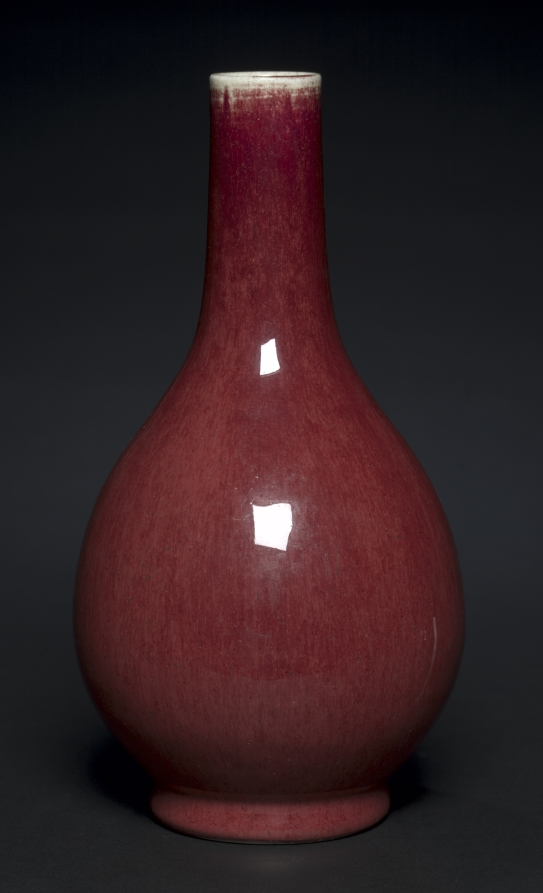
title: Sang de boeuf Vase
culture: China, Qing dynasty (1644-1911)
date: early 1900s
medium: porcelain with copper red glaze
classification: Ceramic